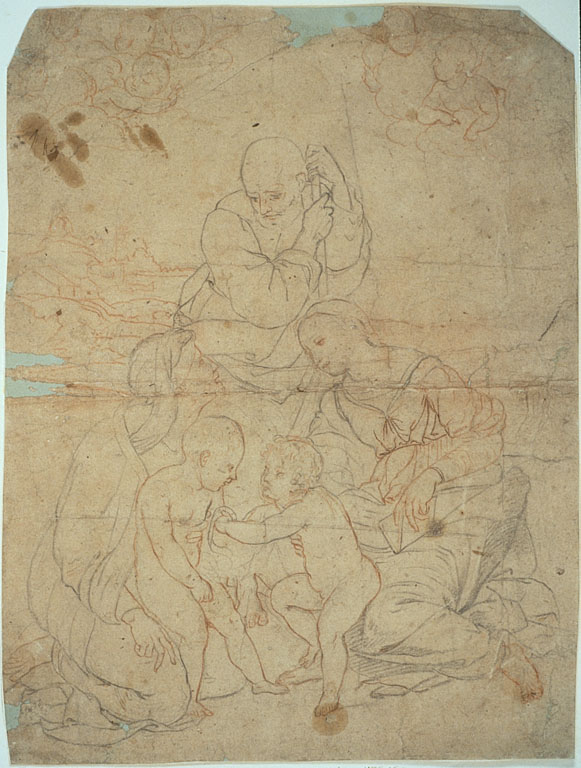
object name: Drawing and Watercolor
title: Holy Family with Saint Elizabeth and the Infant John the Baptist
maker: After Raffaello Sanzio, called Raphael; Italian, 1483-1520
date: c. 1600-1800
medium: Black and red chalk, with touches of pen and black ink, on gray laid paper, laid down on blue wove paper, laid down on card, laid down in album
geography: Italy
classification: chalk; drawings (visual works); prints and drawing